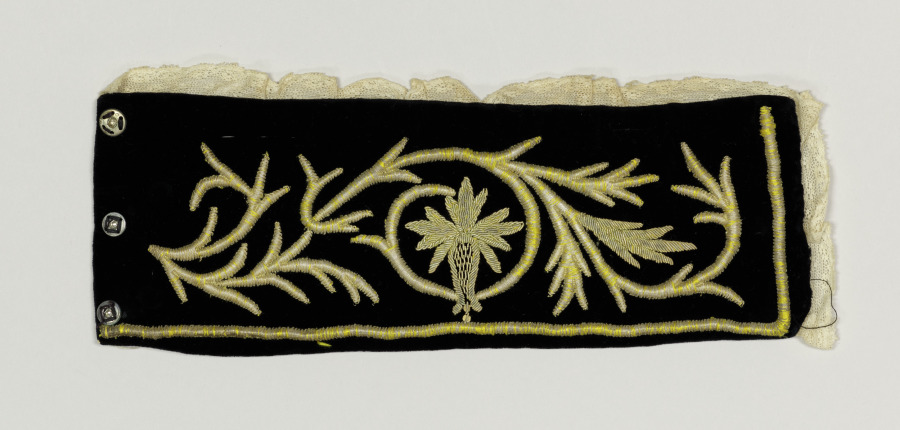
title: Woman's Costume (Cuff)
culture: Italy, Sicily, 19th century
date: 1800s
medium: velvet (black) with metal thread embroidery and lace edging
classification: Garment